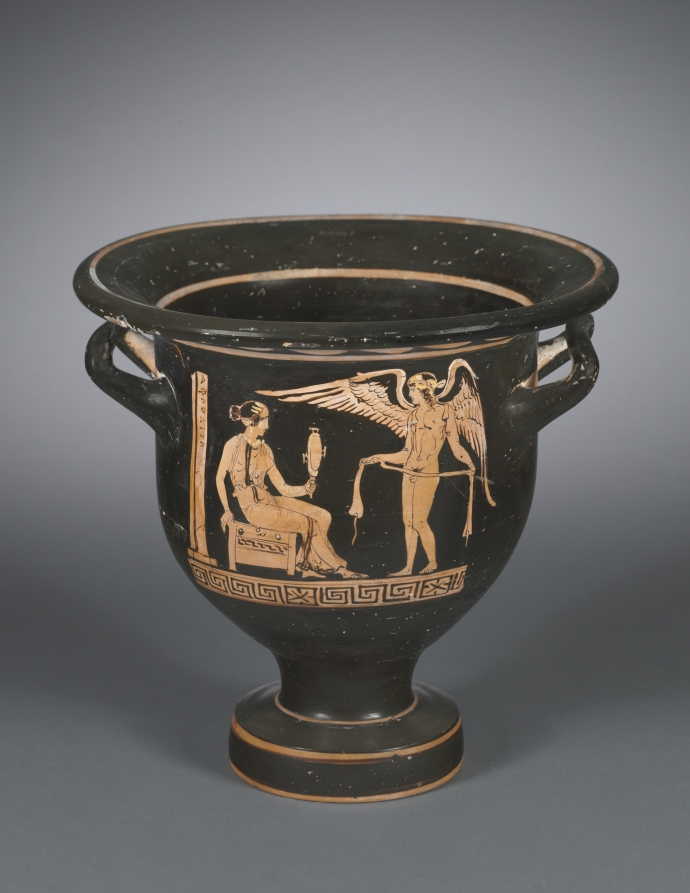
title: Red-Figure Bell Krater (Mixing Vessel): Aphrodite and Eros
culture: South Italian, Apulian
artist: attributed to Graz Painter (South Italian, Apulian, active c. 380–360 BCE)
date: c. 370–360 BCE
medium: ceramic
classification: Ceramic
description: This small mixing vessel shows a finely dressed woman seated on a chest and holding up a mirror to admire herself. Before her stands Eros, the winged god of love, holding a ribbon or sash. Behind the woman stands a pillar with the inscription ΑΦΡΟΔΙΤΗ, or APHRODITE, the goddess of love. Such labels are rare on vases, and scholars debate whether this names the woman shown as Aphrodite herself, with her son Eros, or a bride envisioning herself as Aphrodite, just before her wedding.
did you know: The dancing nude youths on the reverse are unusual; typically they would be standing and draped.